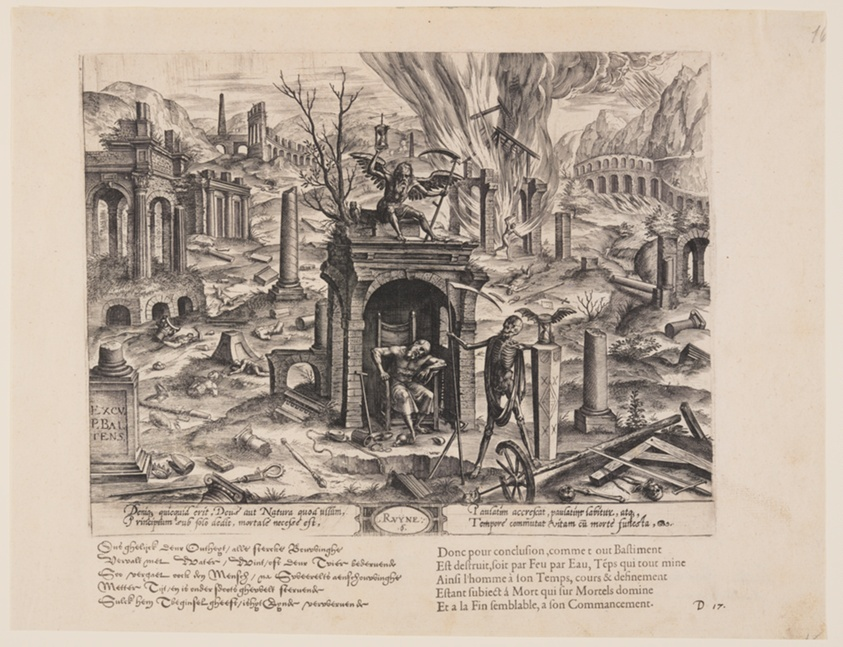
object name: Print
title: Ruyne, from Theatrum Vitae Humanae (The Ages of Man)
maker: Jan Wierix (Flemish, 1549–c. 1618)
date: 1577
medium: Engraving on ivory laid paper, with letterpress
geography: Flanders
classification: engraving; paper; print; prints and drawing